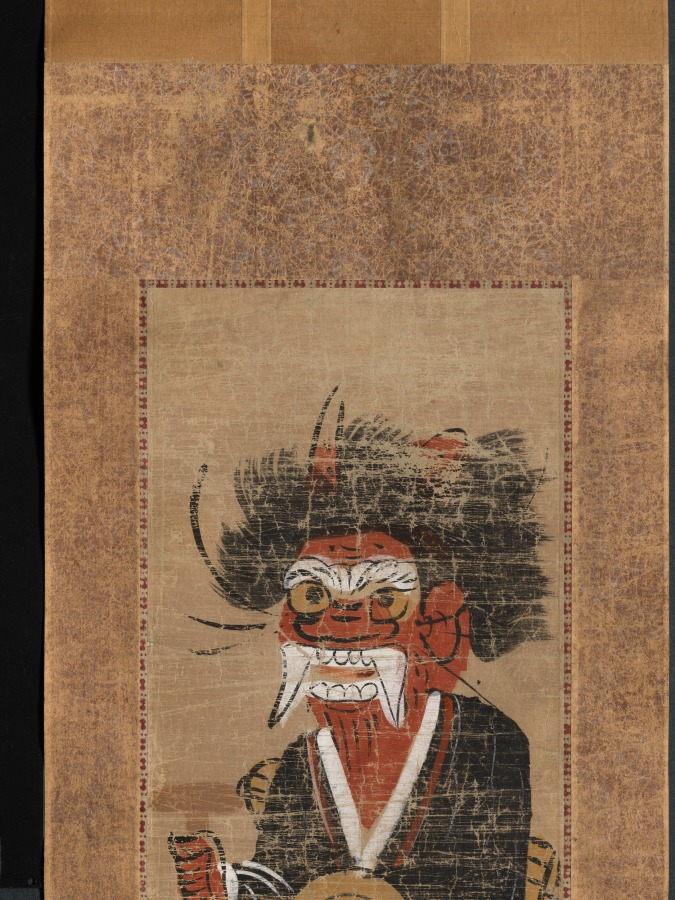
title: Demon Intoning the Name of the Buddha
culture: Japan, Edo period (1615–1868)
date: 1700s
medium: hanging scroll, ink and color on paper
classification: Painting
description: Images like this one that depicts a demon in the guise of an itinerant monk intoning the name of the Buddha are called Otsu-e, or "Otsu paintings." Otsu-e were made as souvenirs for travelers passing through the station of Otsu along the Tokaido, the route stretching from Edo (modern-day Tokyo) to Kyoto. Realized through a combination of woodblock printing, rapid brushstrokes, embellishment with color and gold pigments by stencil or by hand, the earliest Otsu-e, produced in the 17th century, were Buddhist and Shinto icons. Later images included figures popular from Kabuki plays, as well as scenes illustrating parables.